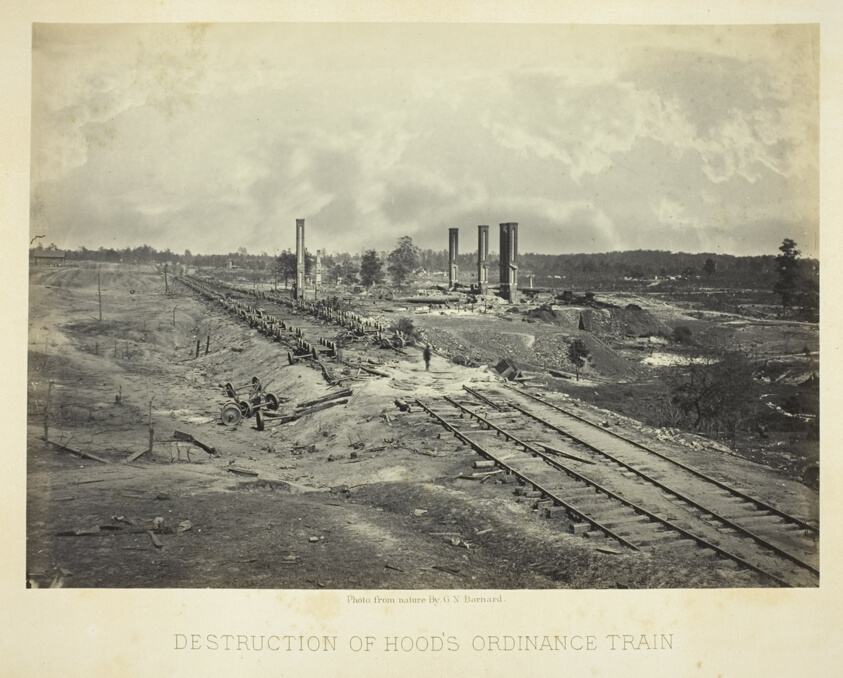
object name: Photograph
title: Destruction of Hood's Ordinance Train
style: 19th century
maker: George N. Barnard (American, 1819–1902)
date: 1864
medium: Albumen print, plate 44 from the album "Photographic Views of the Sherman Campaign" (1866)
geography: United States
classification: albumen silver print; photographic process; photography; photograph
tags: Collected by Hugh Edwards, Sherman's Campaign 1866